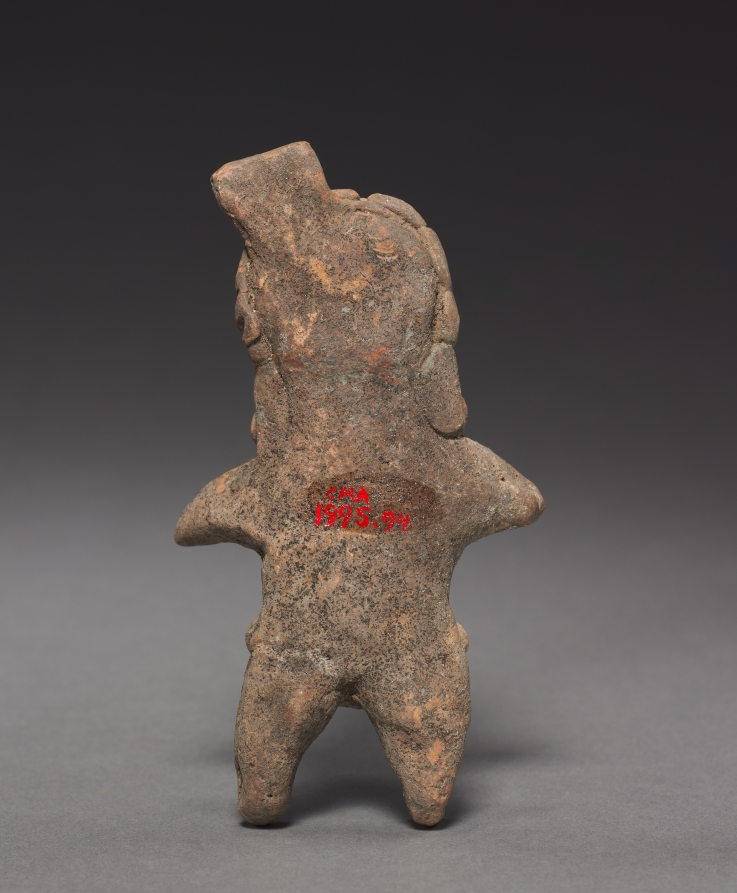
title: Standing Figurine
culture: Mexico, Veracruz, Remojadas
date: c. 150–1 BCE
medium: earthenware with asphalt paint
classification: Sculpture